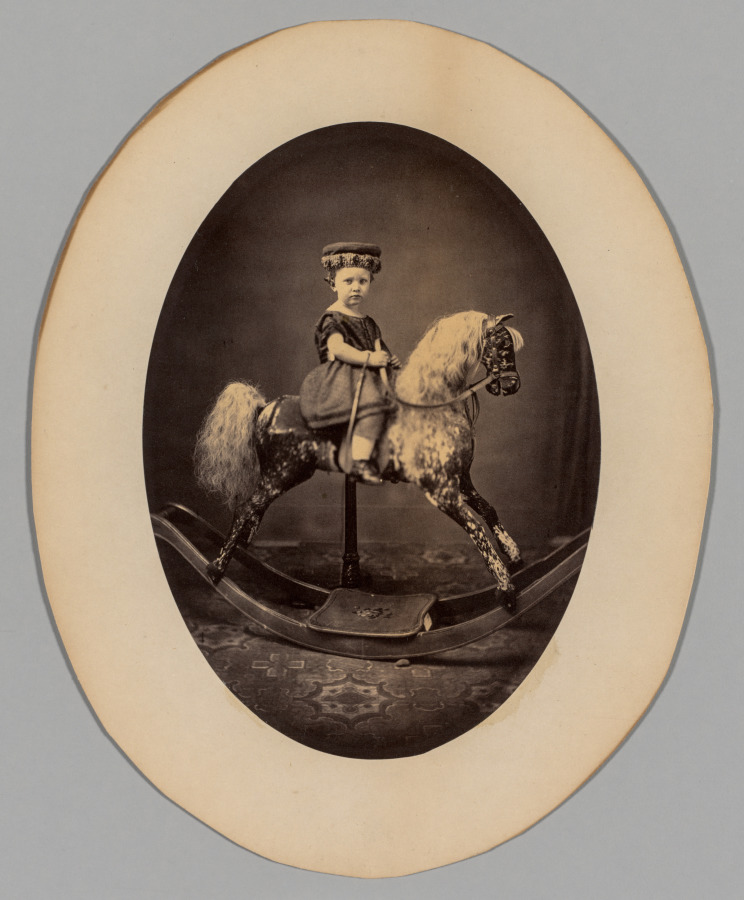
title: Francis Wayland Sherman at the Age of 2 Years 10 Months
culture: America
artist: H.N. Roberts (American, active 1860s)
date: 1862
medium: albumen print from wet collodion negative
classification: Photograph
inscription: written in brown ink on verso: "Francis Wayland Sherman/ Taken at the age of 2 yrs + 10 mos."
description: An inscription on the back of this photograph records the sitter’s identity and age. Because he belonged to a prominent family, it was possible to learn through research that he grew up in Ludlow, Vermont, the son of a successful businessman with pharmaceutical and music enterprises that he later managed. The rocking horse, a favorite toy of Victorian nurseries, may have belonged to the wealthy child or have been a prop in the photographer’s studio. This is an especially luxurious example. Dappled gray rocking horses were the most popular in that era, having been favored by Queen Victoria for her children’s nursery.